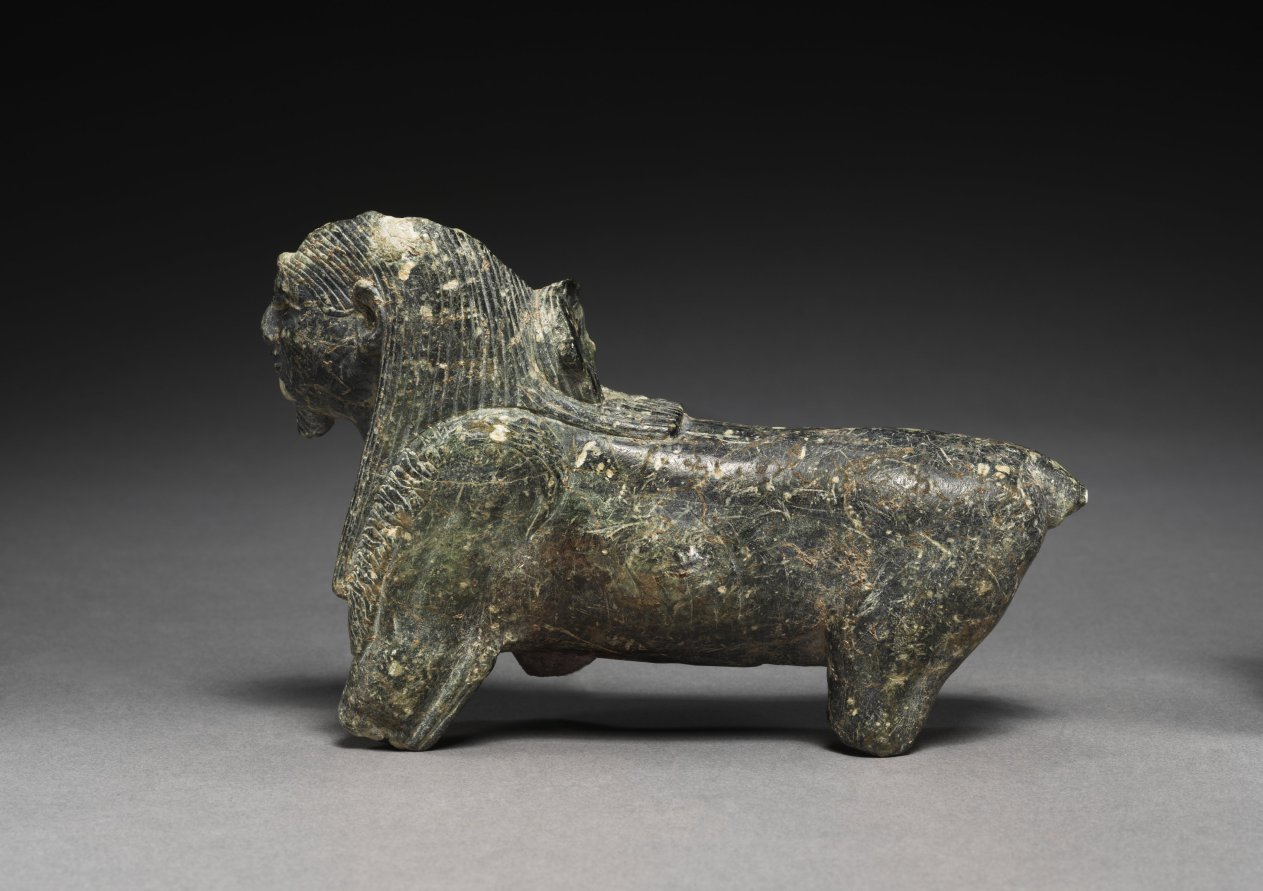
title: Tutu as Sphinx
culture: Egypt, Greco-Roman period (332 BCE–395 CE), Ptolemaic dynasty (305–30 BCE)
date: 150 BCE–30 CE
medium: gray steatite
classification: Sculpture